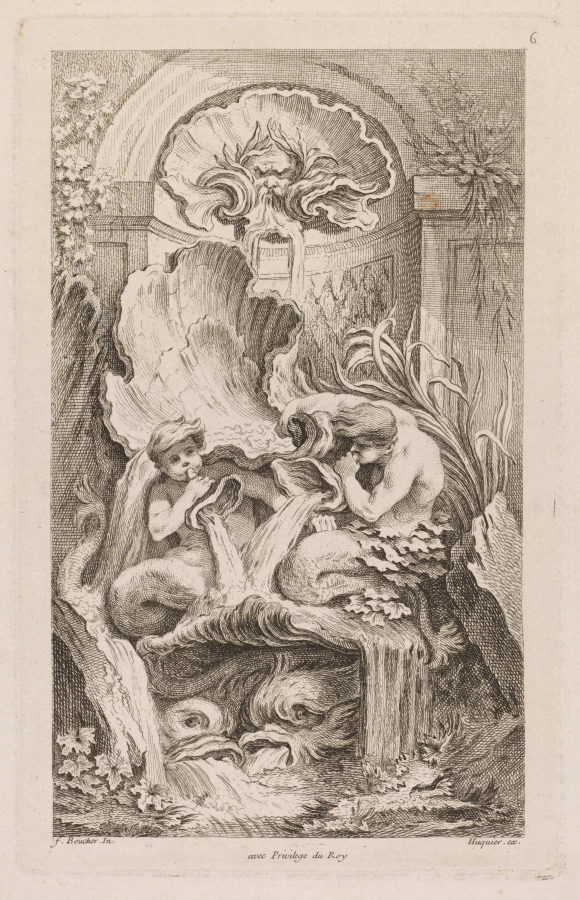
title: No. 6: Fountain with Two Tritons Blowing Conch Shells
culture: France, 18th century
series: Book of Fountains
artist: Gabriel Huquier (French, 1695–1772)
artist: after François Boucher (French, 1703–1770)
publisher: Gabriel Huquier (French, 1695–1772)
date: c. 1736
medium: etching and engraving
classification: Print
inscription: Upper right, in plate: 6; lower left, in plate: F. Boucher. In.; lower center, in plate: avec Privilege du Roy; lower right, in plate: Huquier. ex.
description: François Boucher’s design for a fountain presents an elaborate artistic fantasy with details drawn from mythology and the natural world. Two sea creatures, half-human and half-fish hybrids known as tritons, sit in a shell basin playing a pair of conchs. In the print, Gabriel Huquier transformed Boucher’s rocky grotto into a shell niche featuring the head of the sea god, also called Triton. These designs, though fanciful, reflect a wider Enlightenment interest in the collection and study of shells. In fact, French naturalist Antoine-Joseph Dezallier d’Argenville even opened his scientific treatise on shells, La Conchyliologie, with a related print by Boucher.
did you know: In addition to his fame as an artist, Boucher was known by his contemporaries for his important collection of shells.